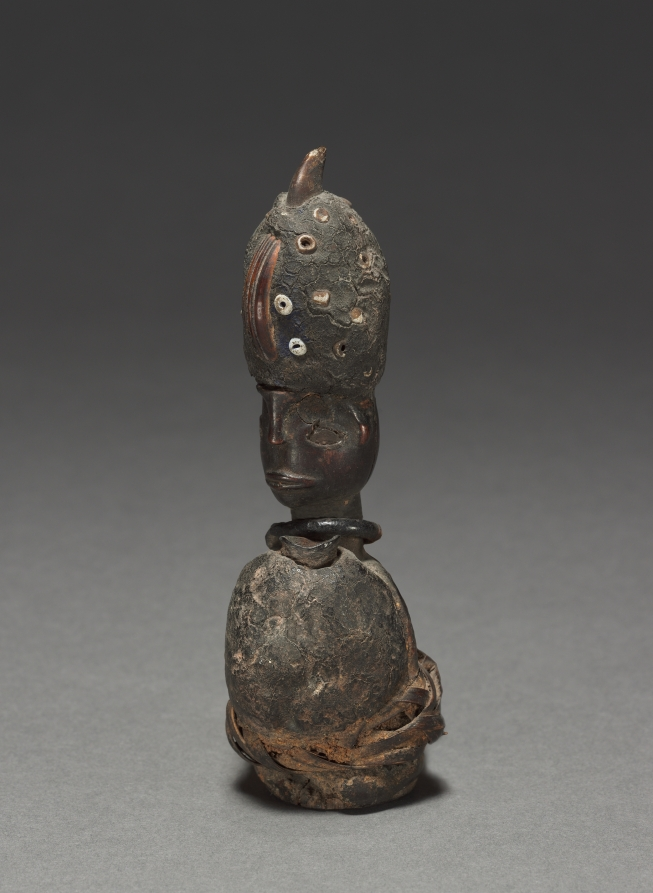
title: Power figure (nkisi)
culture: Central Africa, Republic of the Congo, Kongo people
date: late 1800s-early 1900s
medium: Wood, organic materials (including resin), iron, reed, tooth, seashell or glass beads, and possibly plastic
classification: Sculpture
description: One of seven anthropomorphic figurines, these minkisi contained medicines in which an ancestral spirit was believed to reside. Minkisi were objects of communal use; if conflict arose between two citizens, the Nkisi figure, along with the nganga (ritual leader) helped resolve the dispute. This small figure belonged to “the sorcerer of Loango,” chief of all sorcerers of that region (a province and port in West Central Africa).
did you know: This small figure belonged to “the sorcerer of Loango,” chief of all sorcerers of that region (a province and port in West Central Africa).